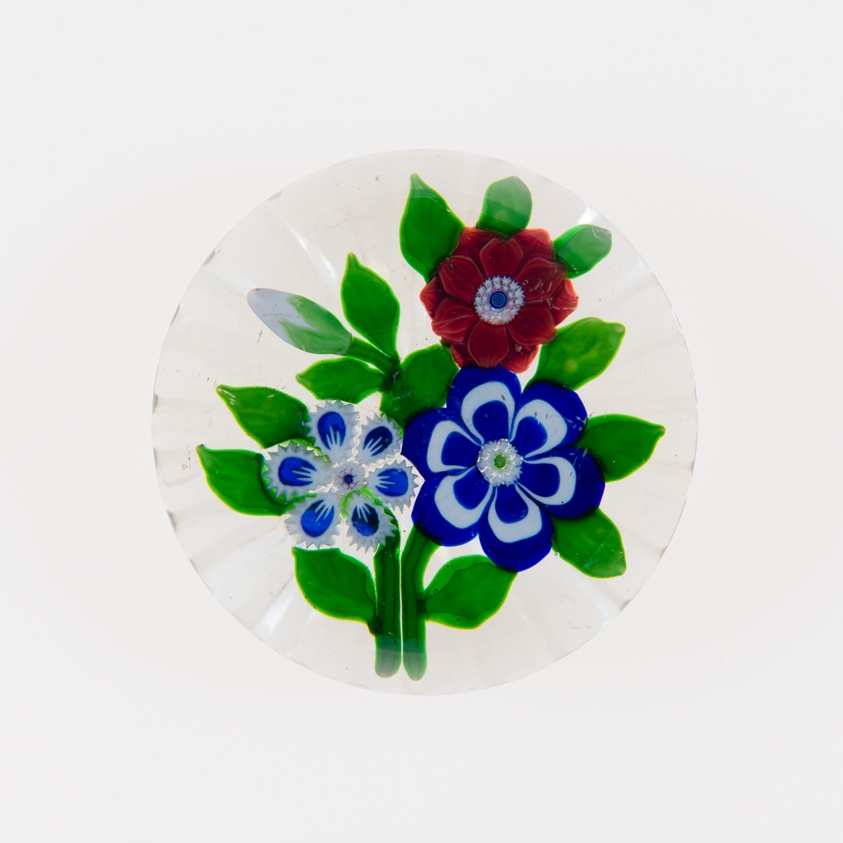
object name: Glass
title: Paperweight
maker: Baccarat Glassworks (Cristalleries de Baccarat); Lorraine, France, founded 1764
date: c. 1845–60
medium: Glass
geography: Baccarat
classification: paperweight; glass